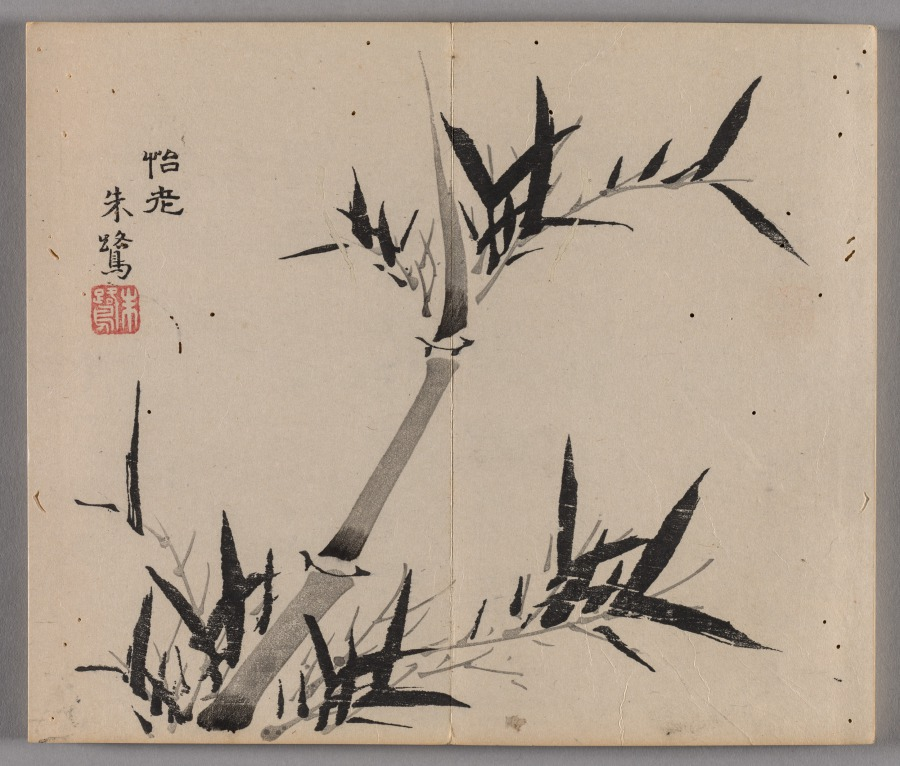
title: Ten Bamboo Studio Painting and Calligraphy Handbook (Shizhuzhai shuhua pu): Bamboo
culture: China, Qing dynasty (1644-1911)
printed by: Hu Zhengyan (Chinese, c. 1584–1674)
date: 1633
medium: Woodblock-printed book; ink and colors on paper; first edition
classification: Print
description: Color printing reached a level of perfection in the early 1600s, as seen in this Ten Bamboo Studio Collection of Calligraphy and Painting and the Mustard Seed Garden Manual of Painting (printed 1679 and 1701). The painterly quality, precision in registering (aligning) the woodblocks, and harmonious colors made them the most successful color print editions in Chinese history. Both editions were printed and compiled in Nanjing, spread nationwide, and had a great impact on the arts in Japan and Korea.